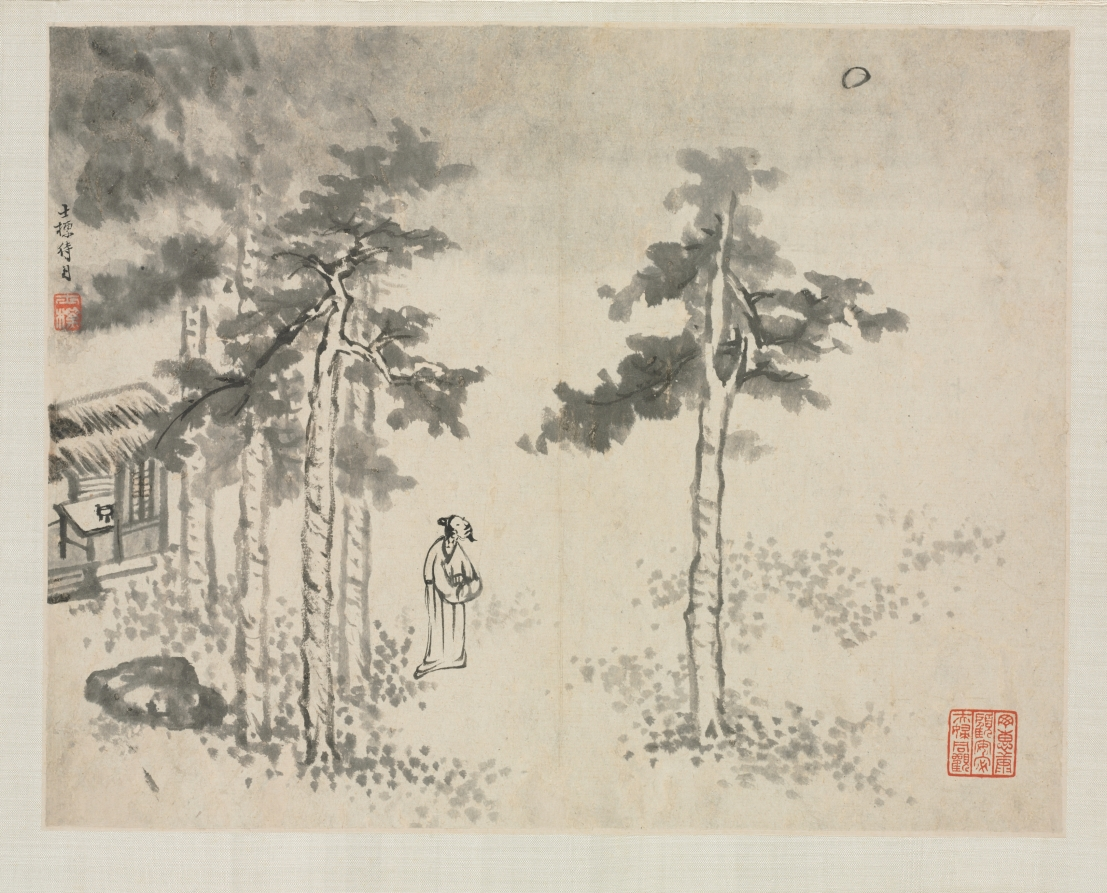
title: Landscape Album in Various Styles: Shibiao Waiting for the Moon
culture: China, Qing dynasty (1644-1911)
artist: Zha Shibiao (Chinese, 1615–1698)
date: 1684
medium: album leaf, ink and light color on paper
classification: Painting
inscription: Artist's inscription, signature, and seal: Shibiao waiting for the moon. [seal] Shibiao.